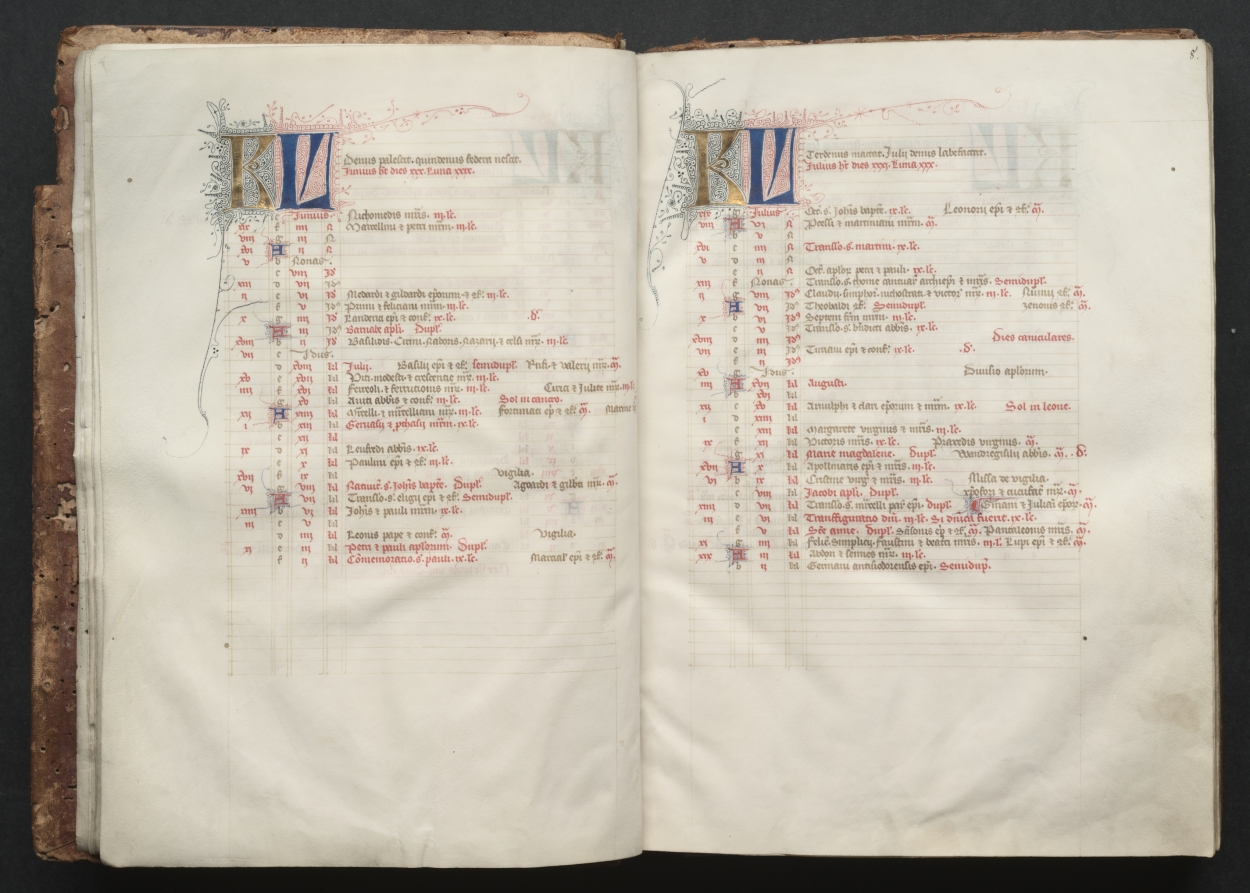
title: The Gotha Missal: Fol. 7v, Text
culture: France, Paris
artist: Master of the Boqueteaux (French)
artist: and Workshop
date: c. 1375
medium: ink, tempera, and gold on vellum; blind-tooled leather binding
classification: Bound Volume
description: The style and quality of this manuscript's decoration is typical of deluxe Parisian books made for aristocratic or royal patrons. Most of the book's decoration appears to be the work of the Master of the Boqueteaux, an artist active at the court of King Charles V (died 1380). His style was apparently shared by a number of book illuminators working in and around Paris. It is very possible that the Gotha Missal belonged to Charles V, but is not provable because the manuscript has no royal portraits and lacks a colophon. Given the book's magnificent decoration, however, it would seem that it was produced for a Valois prince, if not for the king himself. The manuscript receives its name from the German dukes of Gotha, its later owners.